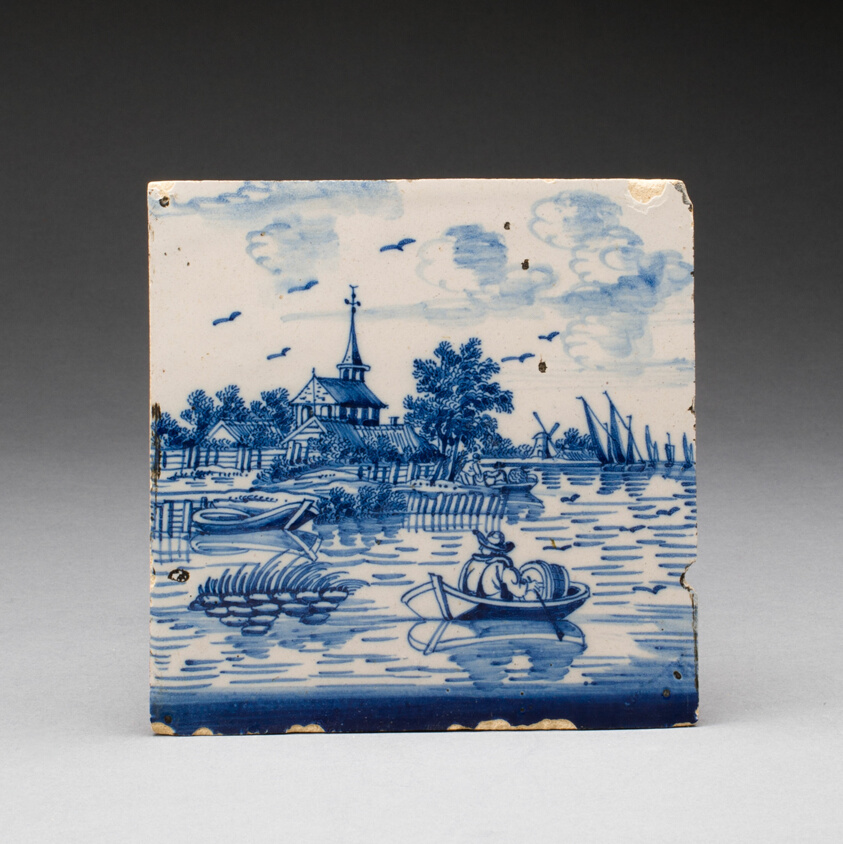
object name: Ceramics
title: Tile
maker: Netherlands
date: 17th/18th century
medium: Tin-glazed earthenware with cobalt decoration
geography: Netherlands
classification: tin-glazed ware; ceramics; european decorative arts; earthenware